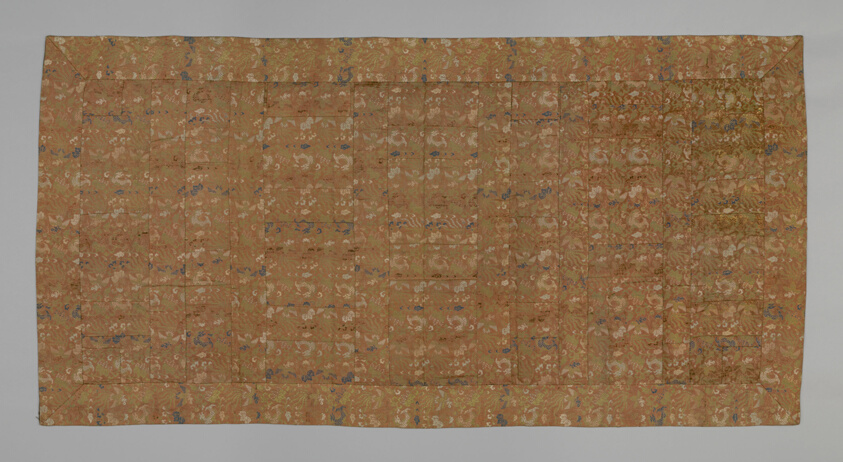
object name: Religious/Ritual Object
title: Kesa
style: edo (japanese period)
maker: Japan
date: Edo period (1615–1868), 18th century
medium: plain compound twill, double weave; silk and gilt-paper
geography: Japan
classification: textile; weaving; liturgical - buddhist; costume; ritual objects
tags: fish, animals